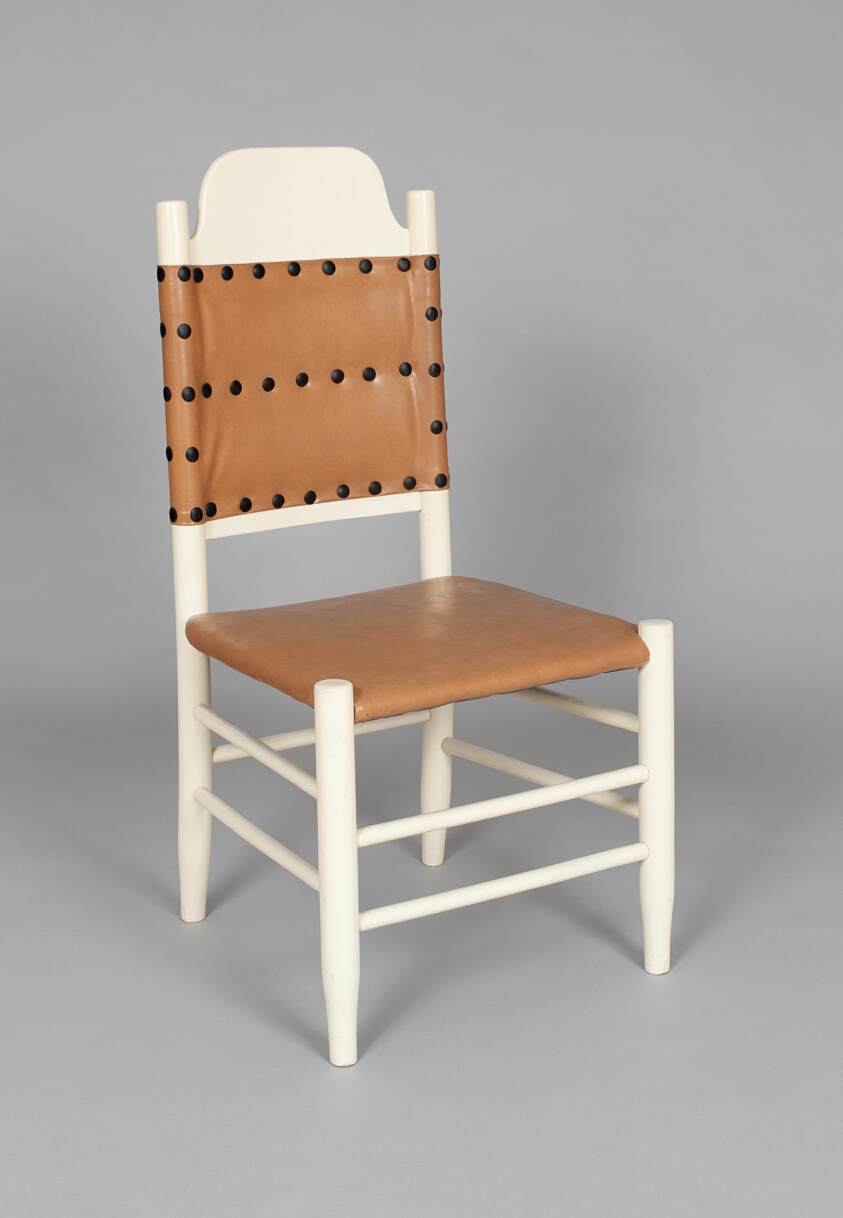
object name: Furniture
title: Side Chair (part of a set)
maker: Designed by Louis Comfort Tiffany (American, 1848–1933); Made by J. Matthew Meier (American, 1830–1913) and Ernest Hagen (American, 1822–1889); New York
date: c. 1885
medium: Painted maple, with vinyl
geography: New York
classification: seating; furniture; american decorative arts; american arts; decorative arts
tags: furniture